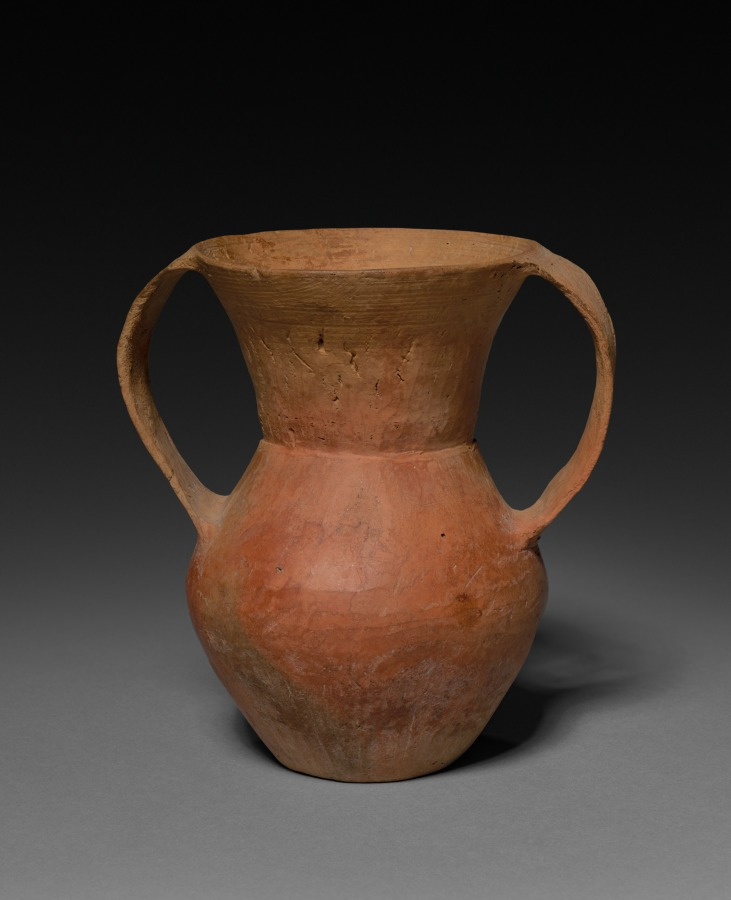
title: Double-Handled Beaker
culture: China, type-site at Qijiaping, Gansu province, Neolithic period, Qijia Culture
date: c. 2000–1500 BCE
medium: burnished earthenware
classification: Ceramic